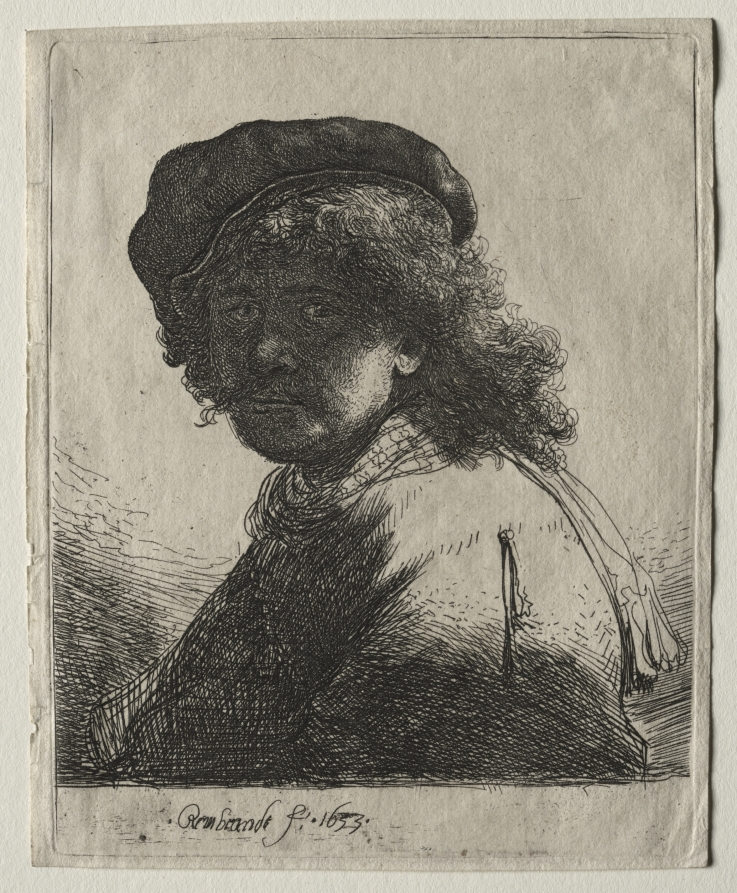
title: Self-Portrait in a Cap and Scarf with the Face Dark: Bust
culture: Netherlands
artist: Rembrandt van Rijn (Dutch, 1606–1669)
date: 1633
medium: etching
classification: Print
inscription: lower left, in plate: Rembrandt f. ·1633· ; VERSO, lower left, in graphite: VI[circled] ; lower center, in graphite: B. 17 ; lower center, in pen and brown ink: R. 1066. -[4?]2